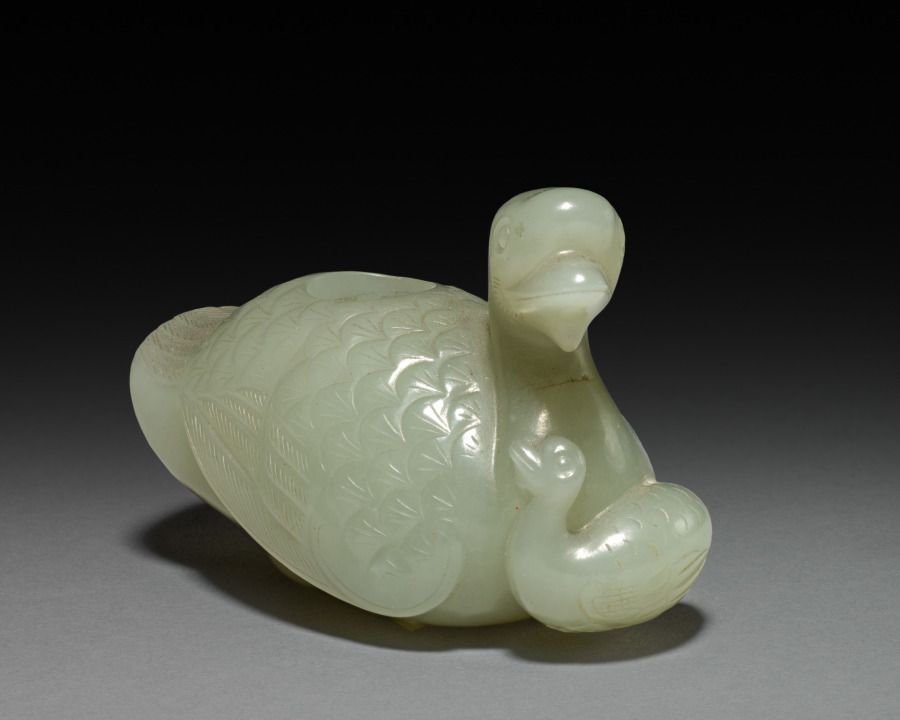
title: Goose and Goslings (container)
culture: China, Qing dynasty (1644-1911)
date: 1700s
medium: jade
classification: Jade